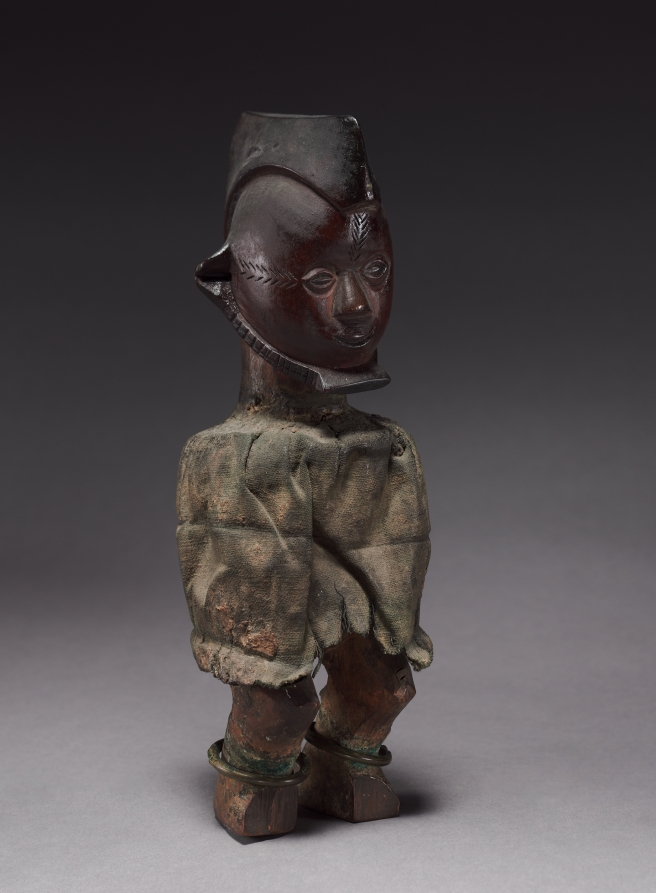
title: Male Figure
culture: Africa, Central Africa, Republic of the Congo or Democratic Republic of the Congo, Teke-style maker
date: late 1800s-early 1900s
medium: Wood, cloth, organic material, and copper alloy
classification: Sculpture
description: This figure was the Delennes' first African art acquisition. They purchased the work in Paris in 1958—the year they were married—from the then leading French dealer Henri Kamer. The couple's interest in African art, which also inspired this particular acquisition, was triggered by their visit to the Congolese pavilion at the Brussels world's fair that same year. This experience made a lasting impression and triggered a lifelong appreciation for the art of what was then still the Belgian Congo. Although Odette later admitted that she knew that this figure was not the best example of Teke art, she and her husband held on to it because it served as a personal souvenir of their meeting each other.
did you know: This figure was the Delennes' first African art acquisition; it symbolized Rene and Odette’s first meeting.